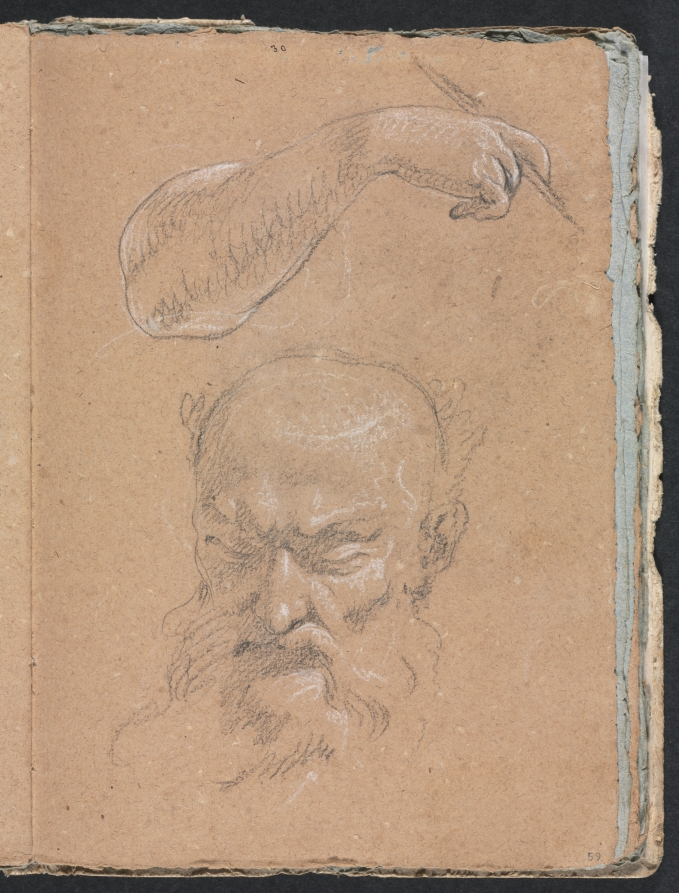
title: Verona Sketchbook: Head of a bearded man and right arm and hand (page 59)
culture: Italy, 18th century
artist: Francesco Lorenzi (Italian, 1723–1787)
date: 1760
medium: black chalk with white heightening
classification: Bound Volume